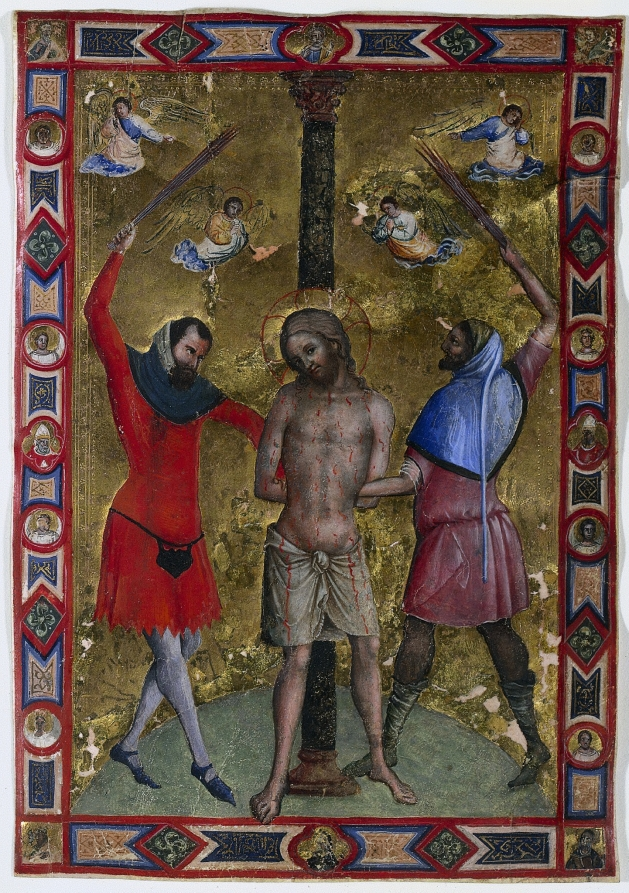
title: Miniature from a Mariegola: The Flagellation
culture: Italy, Venice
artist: Lorenzo Veneziano (Italian)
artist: and Workshop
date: c. 1365–75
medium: tempera and gold on parchment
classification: Manuscript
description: This miniature shows a moment of Christ’s Passion. After receiving his death sentence, Jesus was bound to a column, mocked, and tortured. While two fearsome henchmen beat Jesus with rods, he seems to look directly at the viewer and make a connection with them. The leaf comes from a rule book of a Venetian scuole, a mariegola. Scuole were guilds and lay associations mainly for religious purposes but also for trades and crafts. Five of them were associations of flagellants, a radical movement that became particularly popular since the 1350s in the wake of the Black Death. Christ’s physical suffering served as their model for self-chastisement.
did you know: Although dark in appearance now, the column in the center was originally painted to resemble green marble.